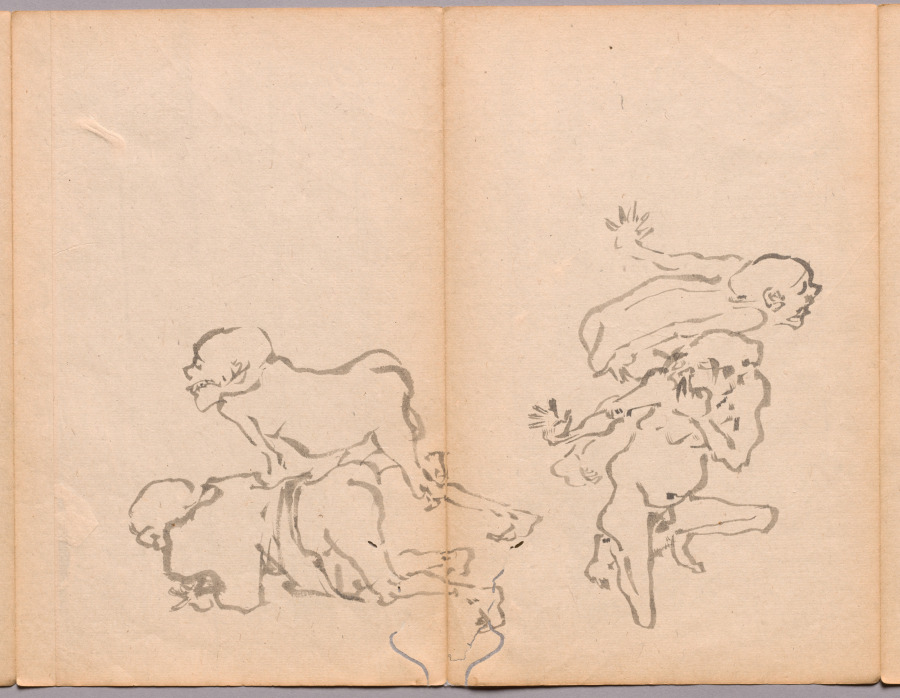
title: Seniors' Farting Contest from Sketch Album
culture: Japan, Edo period (1615–1868) to Meiji period (1868–1912)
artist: Kawanabe Kyōsai (Japanese, 1831–1889)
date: mid- to late 1800s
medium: Accordion-style book of 26 double-leaves; ink and color on paper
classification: Bound Volume